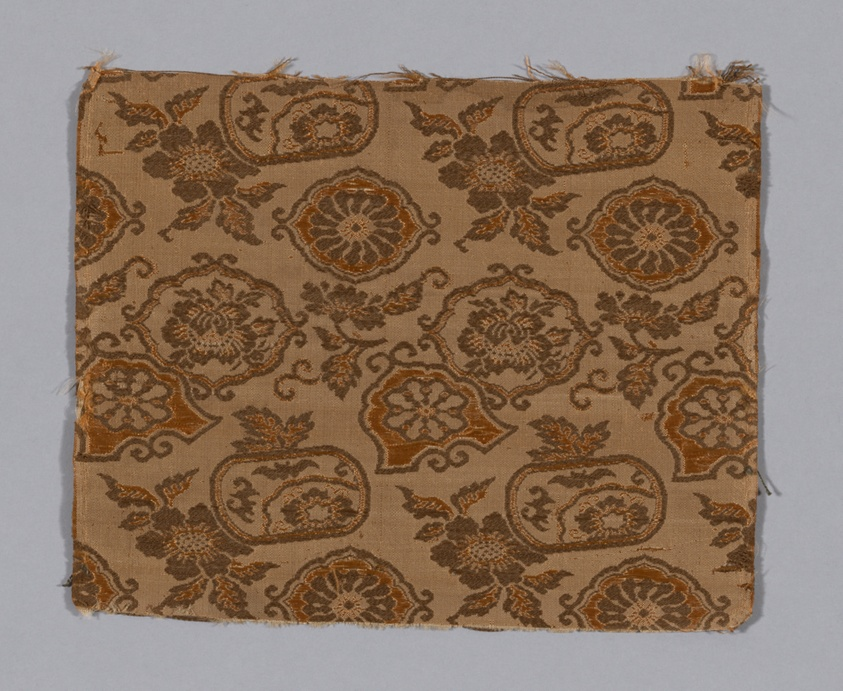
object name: Textile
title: Fragment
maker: Japan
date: late Edo period (1789–1868), 1800/1850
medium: Single plain compound cloth, silk.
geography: Japan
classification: textile; weaving